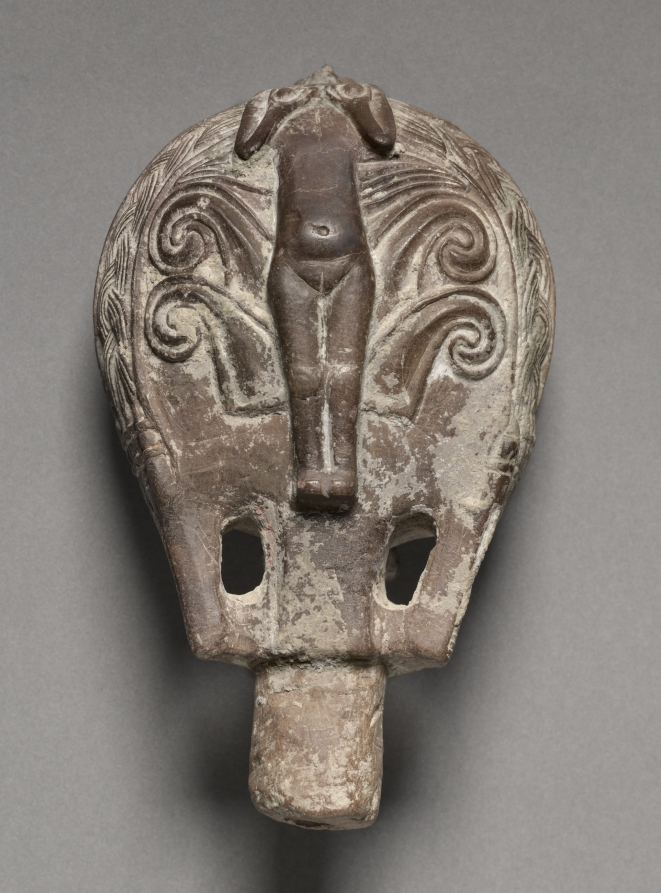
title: Libation Dish-Jar Stopper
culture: Syria, Hittite (?) or Middle Iron Age, Tell Ahmar, Djezizeh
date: 1600–700 BCE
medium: stone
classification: Sculpture